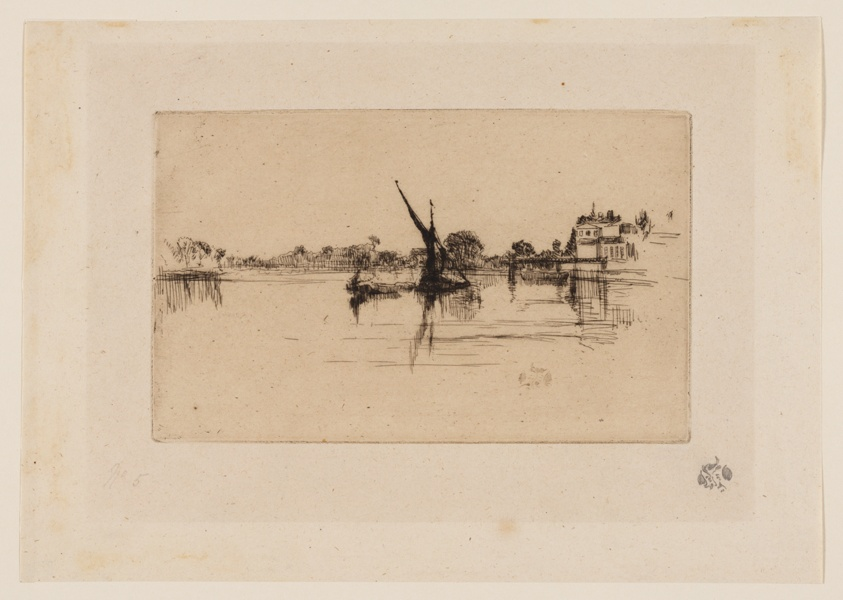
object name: Print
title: The Little Putney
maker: James McNeill Whistler (American, 1834-1903)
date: 1879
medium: Etching and drypoint with foul biting in black ink on cream laid paper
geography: United States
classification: etching; foul biting; drypoint; print; prints and drawing; paper